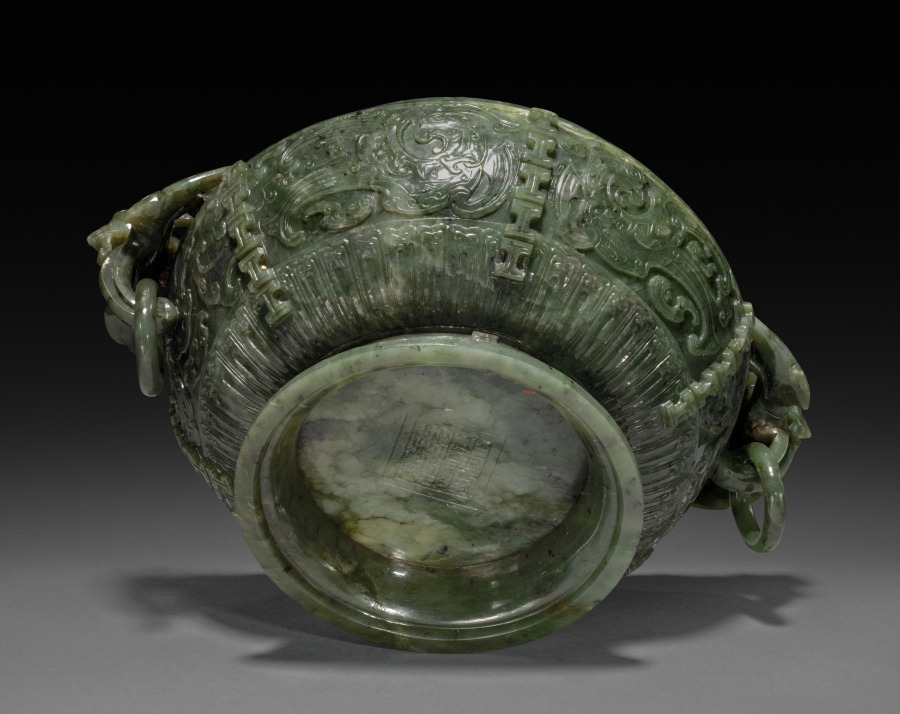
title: Koro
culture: China, Qing dynasty (1644–1911), Qianlong reign (1736–95)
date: 1736–95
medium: jade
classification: Jade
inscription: Qianglong mark on base